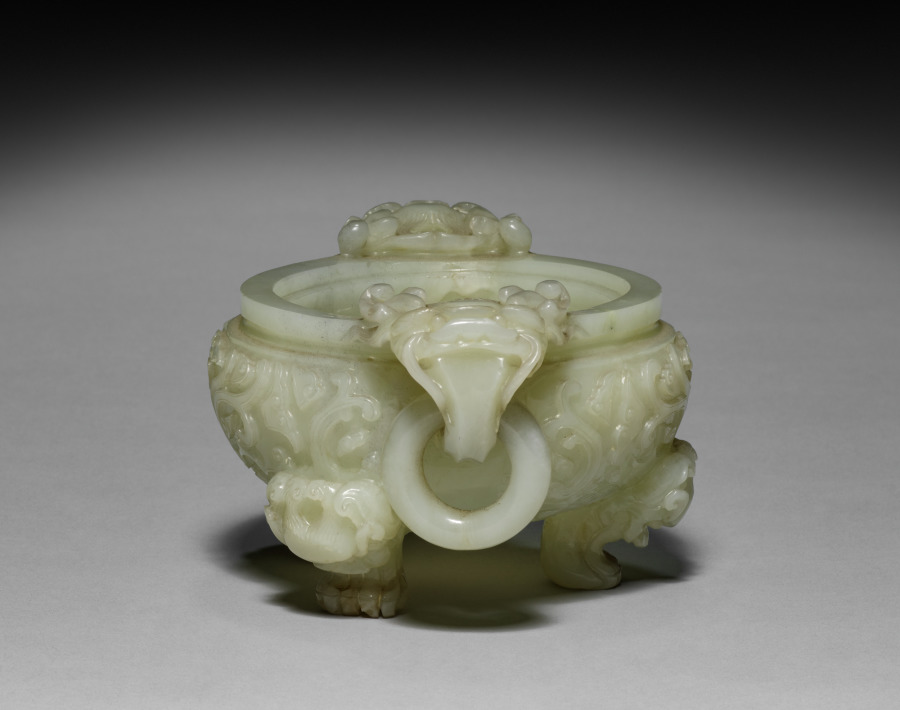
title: Tripod Incense Burner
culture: China, Qing dynasty (1644-1911)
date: 1644–1911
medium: jade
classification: Jade